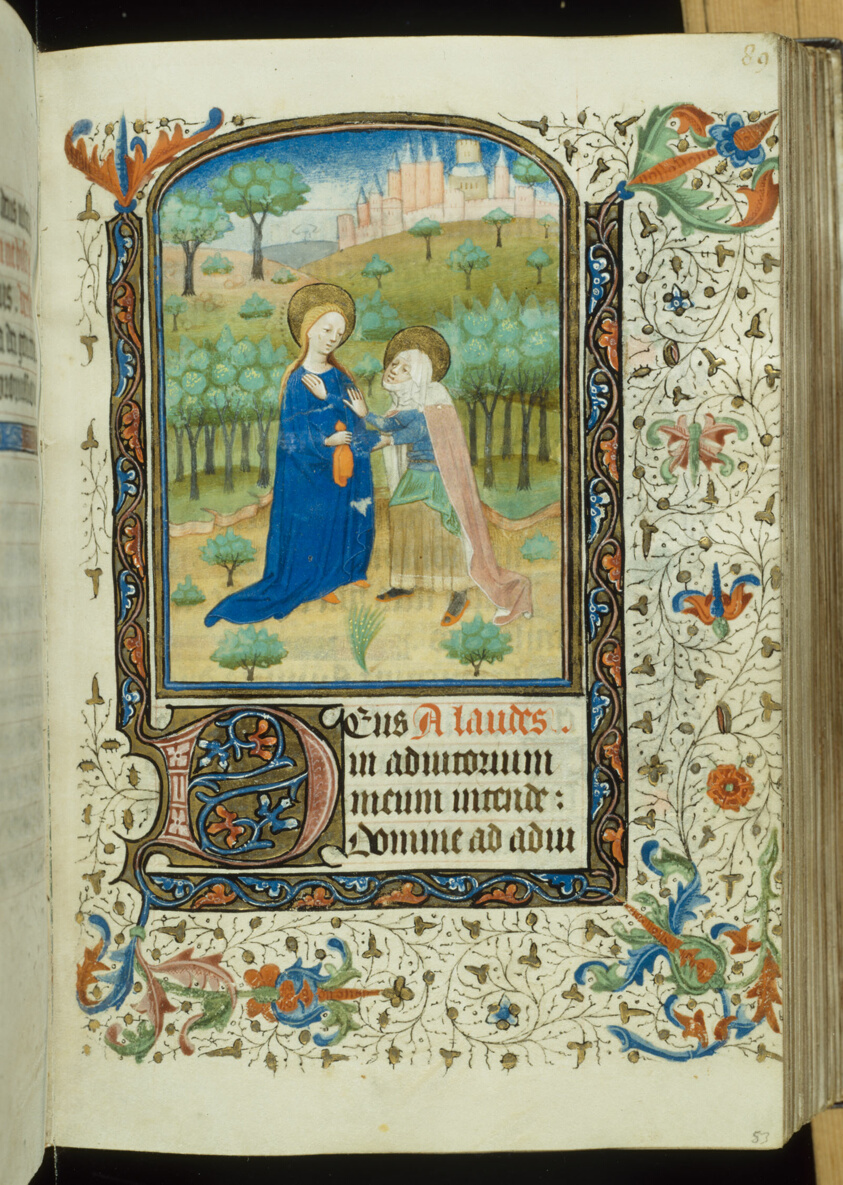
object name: Book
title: The Visitation, from a Book of Hours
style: medieval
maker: Workshop of the Master of the Ghent Privileges; Flanders (Ghent or Tournai, active 1430s-1460s)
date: c. 1440-1445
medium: Manuscript with 230 folios, 12 full-page miniatures and other decorations in gold leaf, tempera and colored inks, and littera textualis inscriptions in Latin and French in dark black ink, ruled in red with red rubrics, on parchment, with two parchment fly leaves upper cover, three parchment fly leaves lower cover, sheets with gilded edges, in modern binding of brown morocco leather over wooden boards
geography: Flanders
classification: book; manuscript; prints and drawing